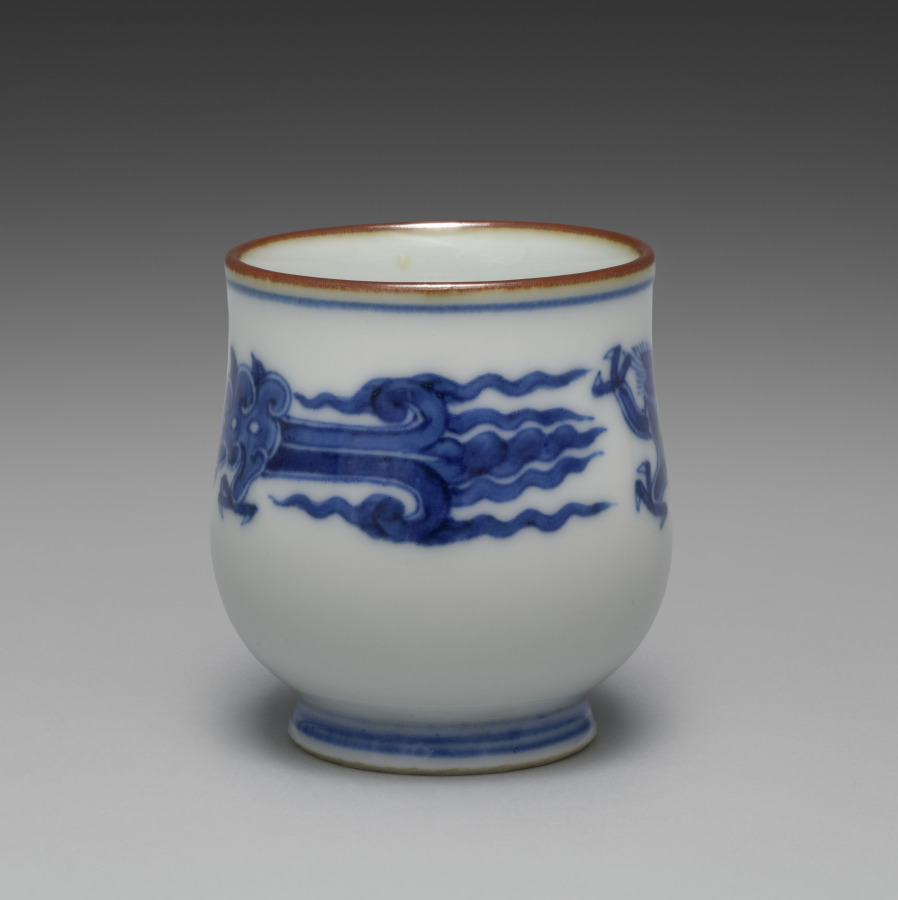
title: Cup from Sake Cups with Dragons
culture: Japan, Meiji period (1868–1912)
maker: Seifū Yohei III (Japanese, 1851–1914)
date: c. 1893–1914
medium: One from a set of six sake cups; porcelain with underglaze blue and iron oxide rims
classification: Ceramic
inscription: 大日本清風造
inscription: 清風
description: Each of these sake cups pictures two backward-looking dragons. The highly stylized creatures resemble jade carvings.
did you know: Seifū Yohei III was inspired by the Chinese mythical animals that were common on porcelain objects made at Jingdezhen in China during the Ming dynasty (1368–1644) and then exported around the world.